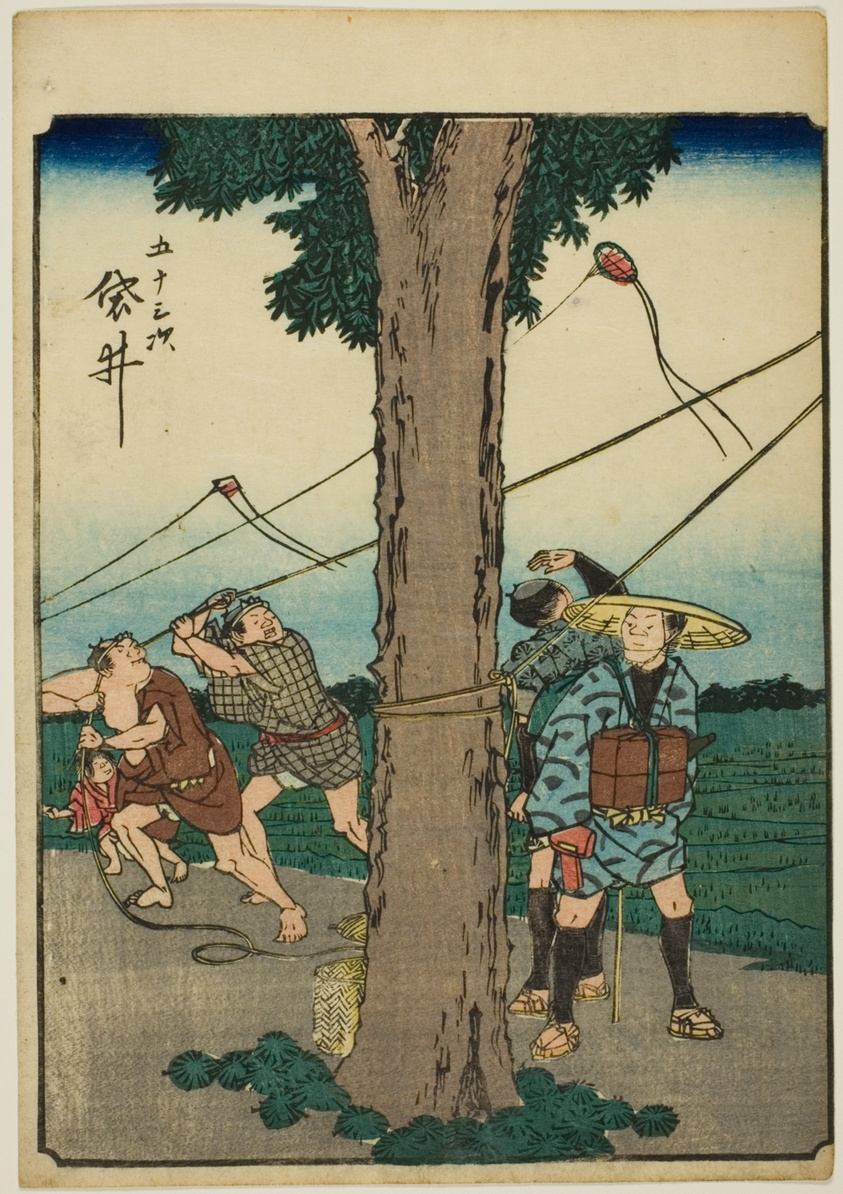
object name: Print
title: Fukuroi, from the series "Fifty-three Stations [of the Tokaido] (Gojusan tsugi)," also known as the Figure Tokaido (Jinbutsu Tokaido)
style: Japanese (culture or style)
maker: Utagawa Hiroshige 歌川 広重; Japanese, 1797-1858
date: 1852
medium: Color woodblock print; chuban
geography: Japan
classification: woodblock print; print